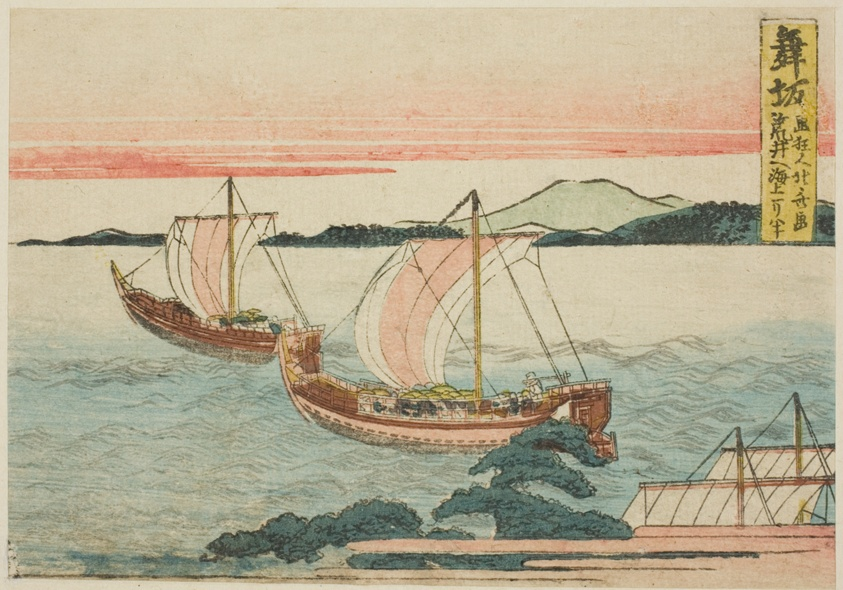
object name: Print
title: Maisaka, from an untitled series of the fifty-three stations of the Tokaido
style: Japanese (culture or style)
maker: Katsushika Hokusai 葛飾 北斎; Japanese, 1760-1849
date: c. 1804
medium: Color woodblock print; kokonotsugiri-ban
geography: Japan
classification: woodblock print; print; asian art